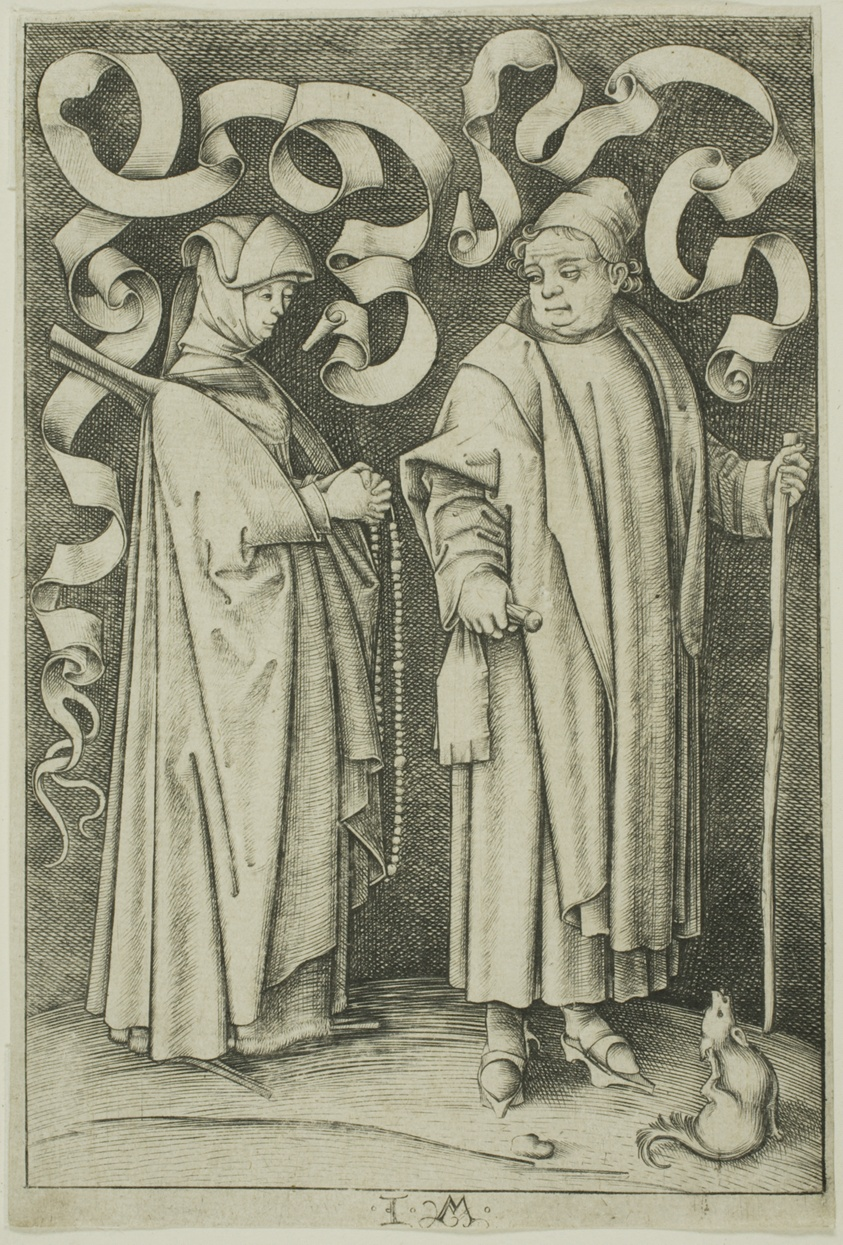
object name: Print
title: The Churchgoers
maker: Israhel van Meckenem the Younger; German, c. 1440/45-1503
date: c. 1495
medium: Engraving on ivory laid paper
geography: Germany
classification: engraving; print; prints and drawing